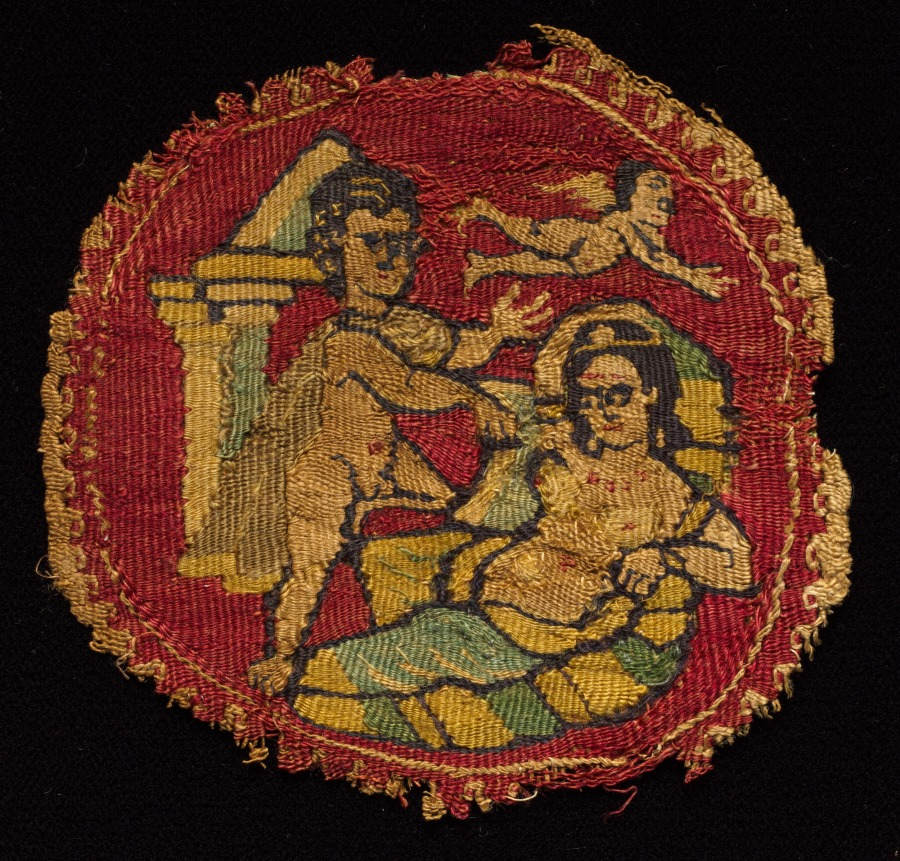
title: Four Segmenta from a Tunic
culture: Egypt, Umayyad period (661–750)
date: 650 – 750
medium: tapestry weave; wool and linen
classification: Textile